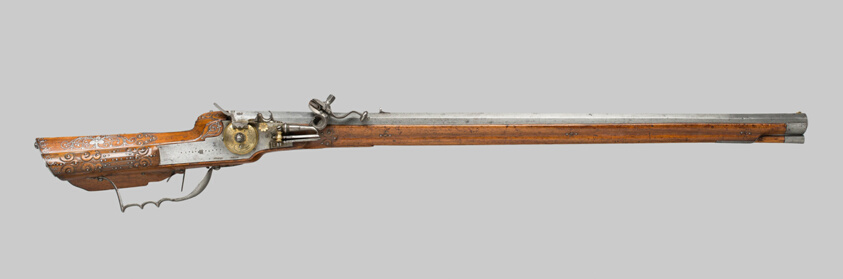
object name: Arms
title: Wheellock Rifle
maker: Hans Heller (Possibly), Locksmitih; German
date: 1665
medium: Walnut, iron, brass, and steel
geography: Germany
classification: firearm-long gun; arms; arms and armor